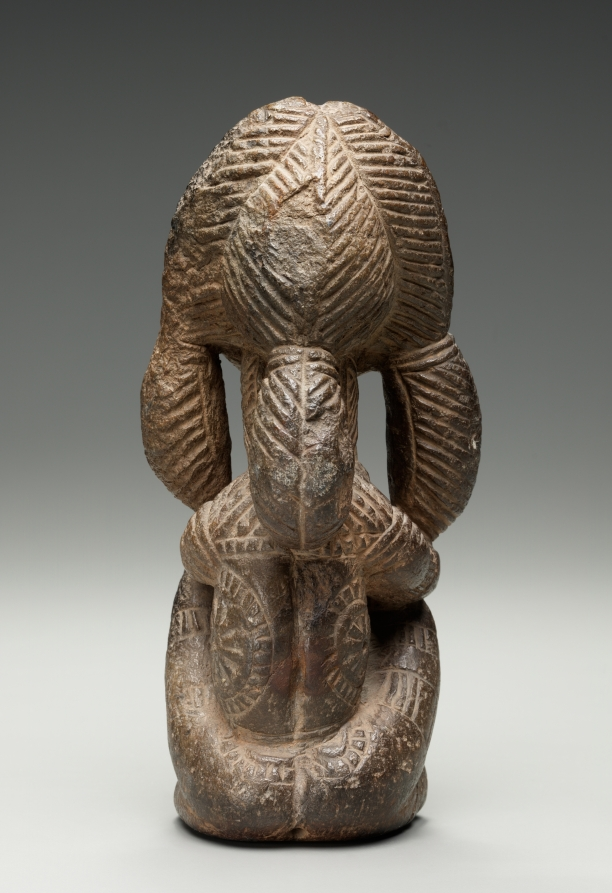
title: Figure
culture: Africa, West Africa, Sierra Leone, Sapi-style carver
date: possibly early 1400s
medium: soapstone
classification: Sculpture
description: The most varied group of soapstone figures and heads has been found in the homelands of the Kissi. Calling them pomda ("images of the dead"), the Kissi placed them in ancestral shrines, offering them the last seeds at sowing times and the first fruits of the harvest. However, the sculptures are believed to have been made centuries ago by the ancestors of the Kissi, the so-called Sapi people.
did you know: Sapi sculptors worked in stone—like in this sculpture—as well as ivory.